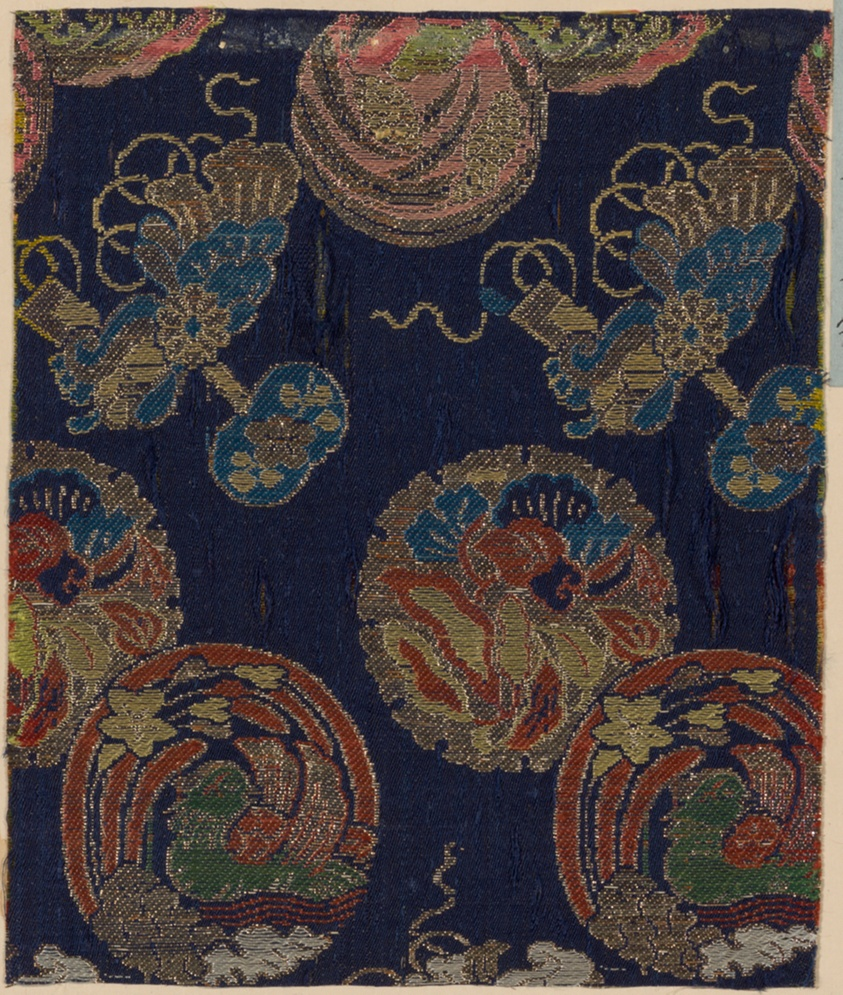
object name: Textile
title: Fragment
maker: Japan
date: Edo period (1615–1868), 1775/1825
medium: Plain compound twill, silk & gilr paper; 2 strips to m.m.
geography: Japan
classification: textile; weaving